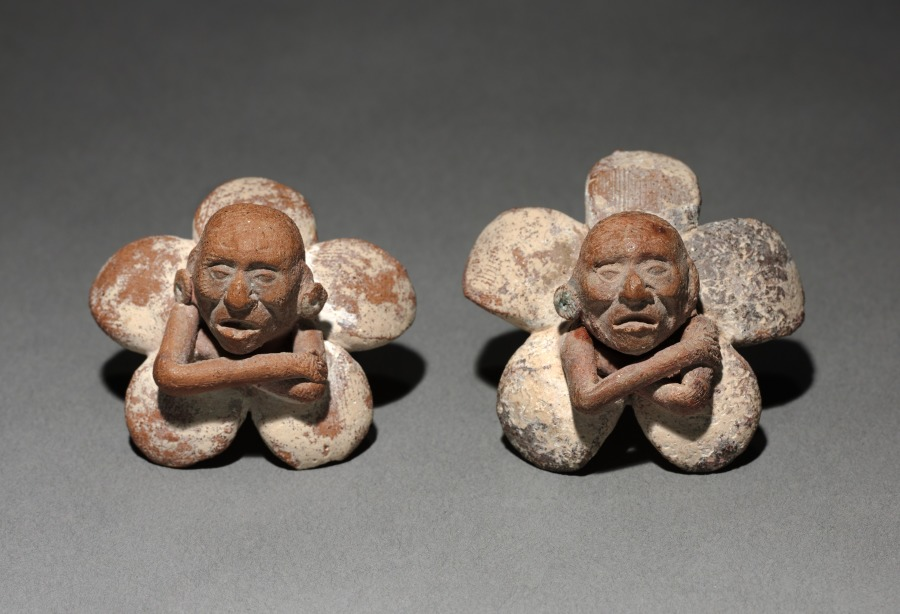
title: Pair of Figure in Flower Ornaments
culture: Mexico, Yucatán, Jaina Island region, Campeche, Maya style (250-900)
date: 500–900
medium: earthenware with slip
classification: Jewelry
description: Figures within flowers are one of the most enchanting themes of the Maya ceramic art of Jaina, an island off the western Yucatán coast. The figures, usually males who cross their arms over their bodies, are either radiantly youthful or aged (as here), suggesting a relationship to the life cycle.